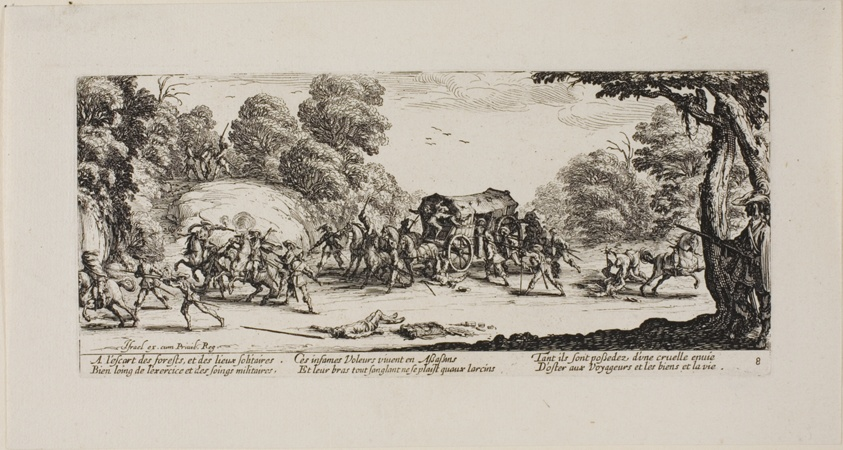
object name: Print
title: Attack on the Coach, plate eight from The Miseries of War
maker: Jacques Callot (French, 1592-1635); published by Israël Henriet (French, 1590-1661)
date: 1633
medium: Etching on paper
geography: France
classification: etching; print; prints and drawing